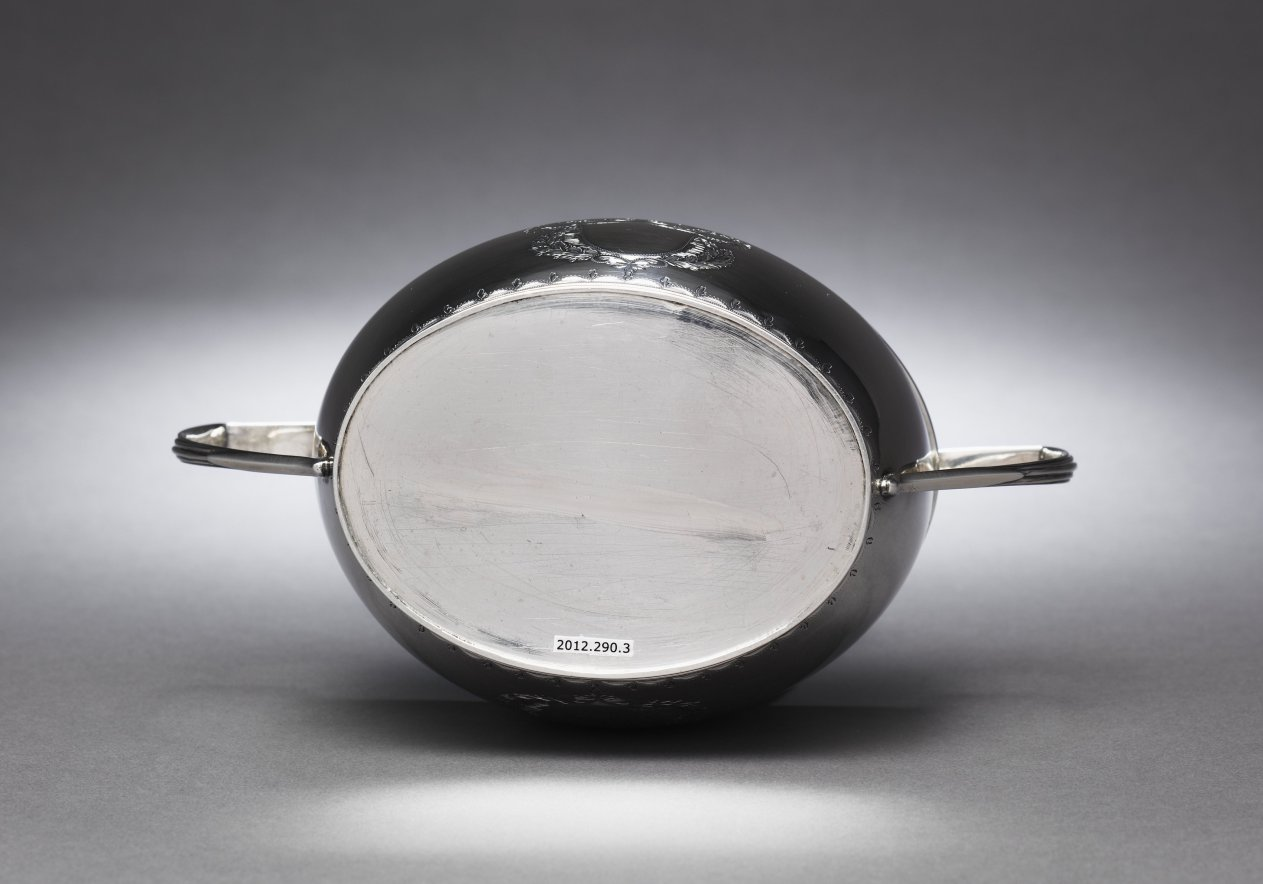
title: Tea Service (Sugar Bowl)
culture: London, England, 19th century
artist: Anne Bateman (British, 1748–1813)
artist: Peter Bateman (British, 1740–1825)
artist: William (I) Bateman (British, 1774–1850)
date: 1807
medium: silver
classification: Silver